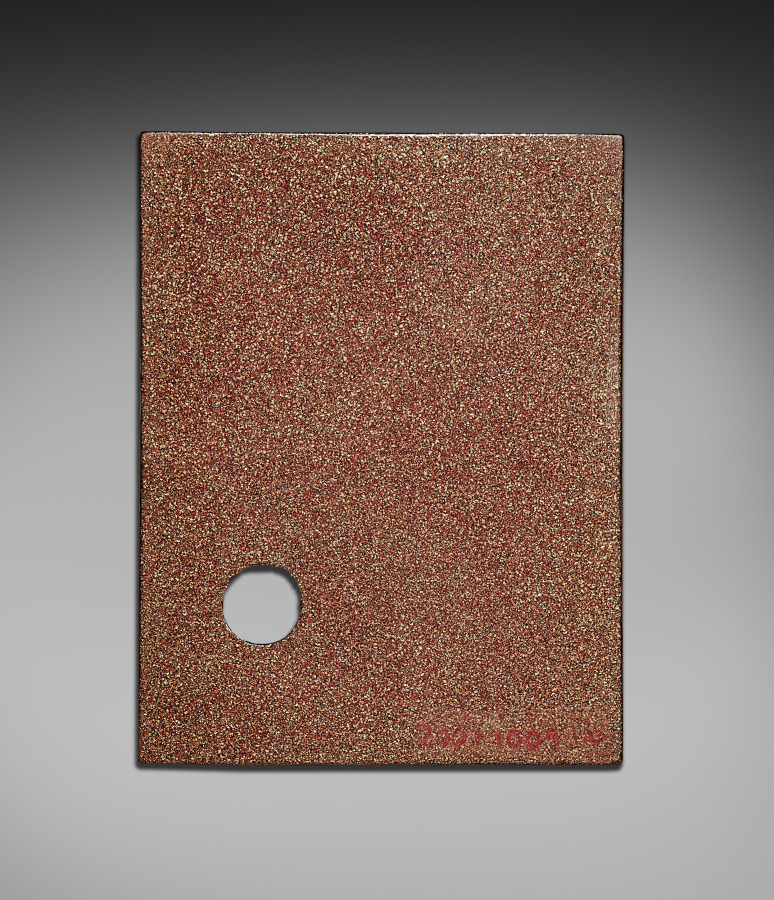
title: Nested Boxes with Chrysanthemums (outer box base)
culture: Japan, Meiji period (1868–1912)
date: early 1900s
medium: lacquer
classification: Lacquer